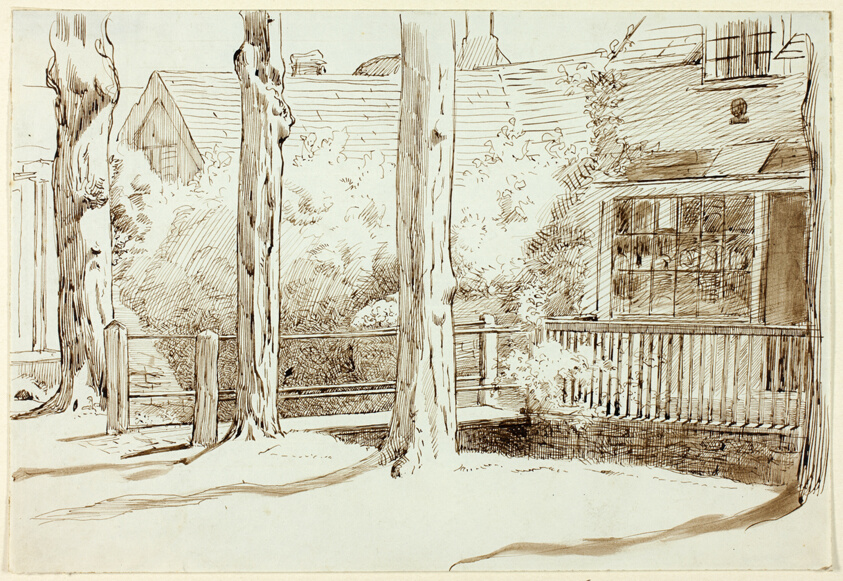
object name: Drawing and Watercolor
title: House and Old Trees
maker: Henry Stacy Marks (English, 1829-1898)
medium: Pen and brown ink, with brush and brown wash, on blue wove paper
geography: England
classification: pen and ink drawings; drawings (visual works); prints and drawing